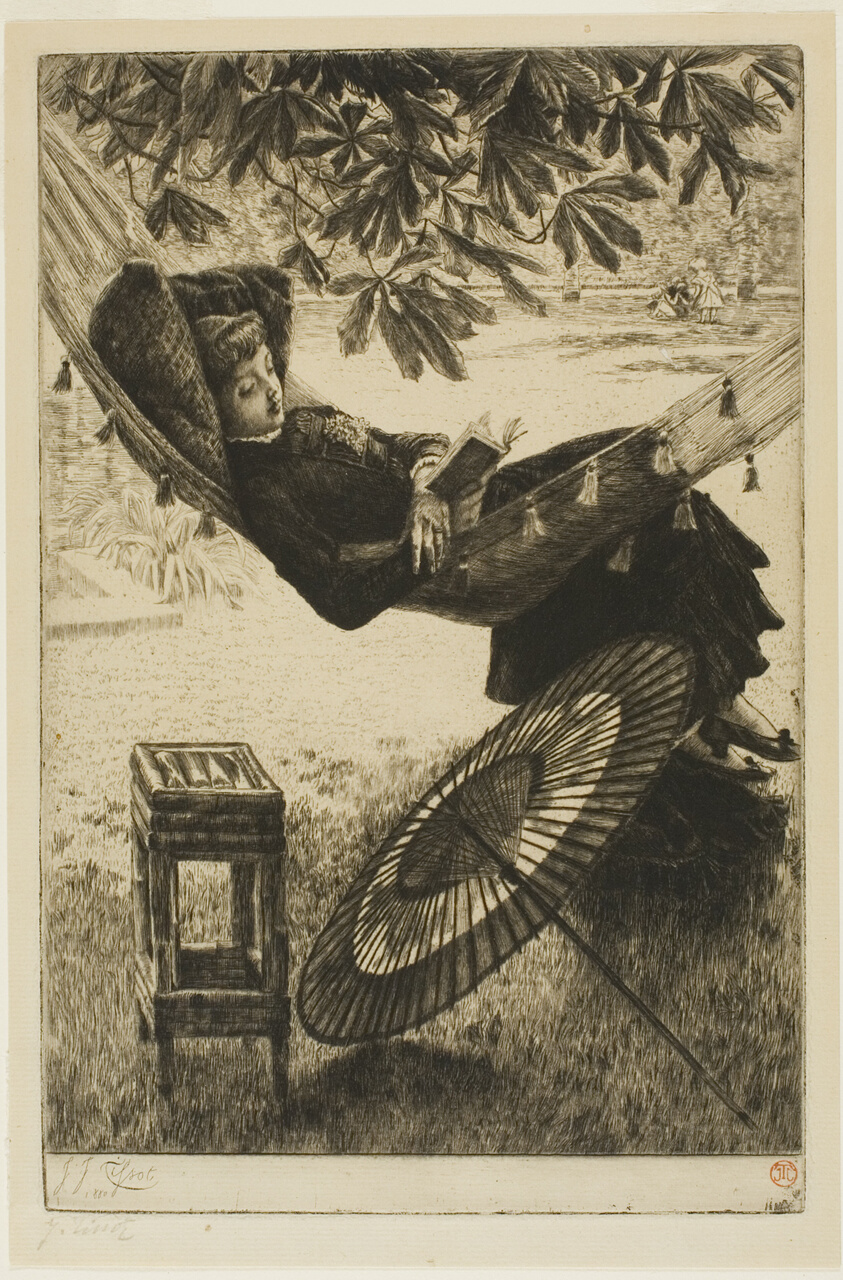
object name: Print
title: The Hammock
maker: James Tissot (French, 1836-1902)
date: 1880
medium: Etching and drypoint on cream laid paper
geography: France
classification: etching; print; prints and drawing